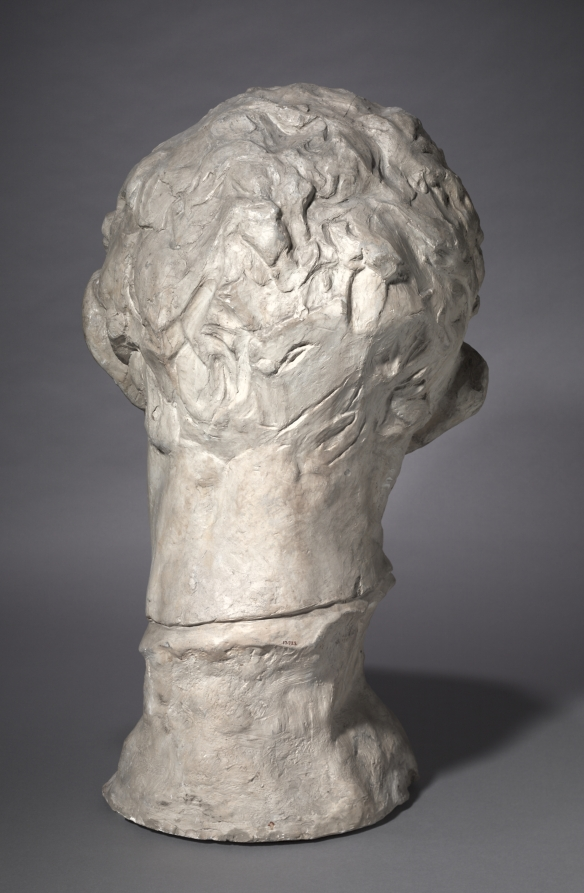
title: Heroic Head of Pierre de Wissant, One of the Burghers of Calais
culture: France, late 19th-early 20th Century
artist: Auguste Rodin (French, 1840–1917)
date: 1886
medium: plaster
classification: Sculpture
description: This sculpture depicts one of the figures in Rodin’s large public monument The Burghers of Calais (1884–89), featuring six French men who volunteered to be taken prisoner by the English in exchange for lifting the siege of Calais during the Hundred Years War (1337–1453). Pierre de Wissant’s anguished expression suggests extreme mental suffering as he contemplates his expected execution. Rodin exhibited a life-size version of the figure as an independent work before completing the monument. He later made multiple versions in various sizes and media. This plaster features a highly expressive, hand-worked surface inscribed in places with graphite and covered with delicate, tinted washes.